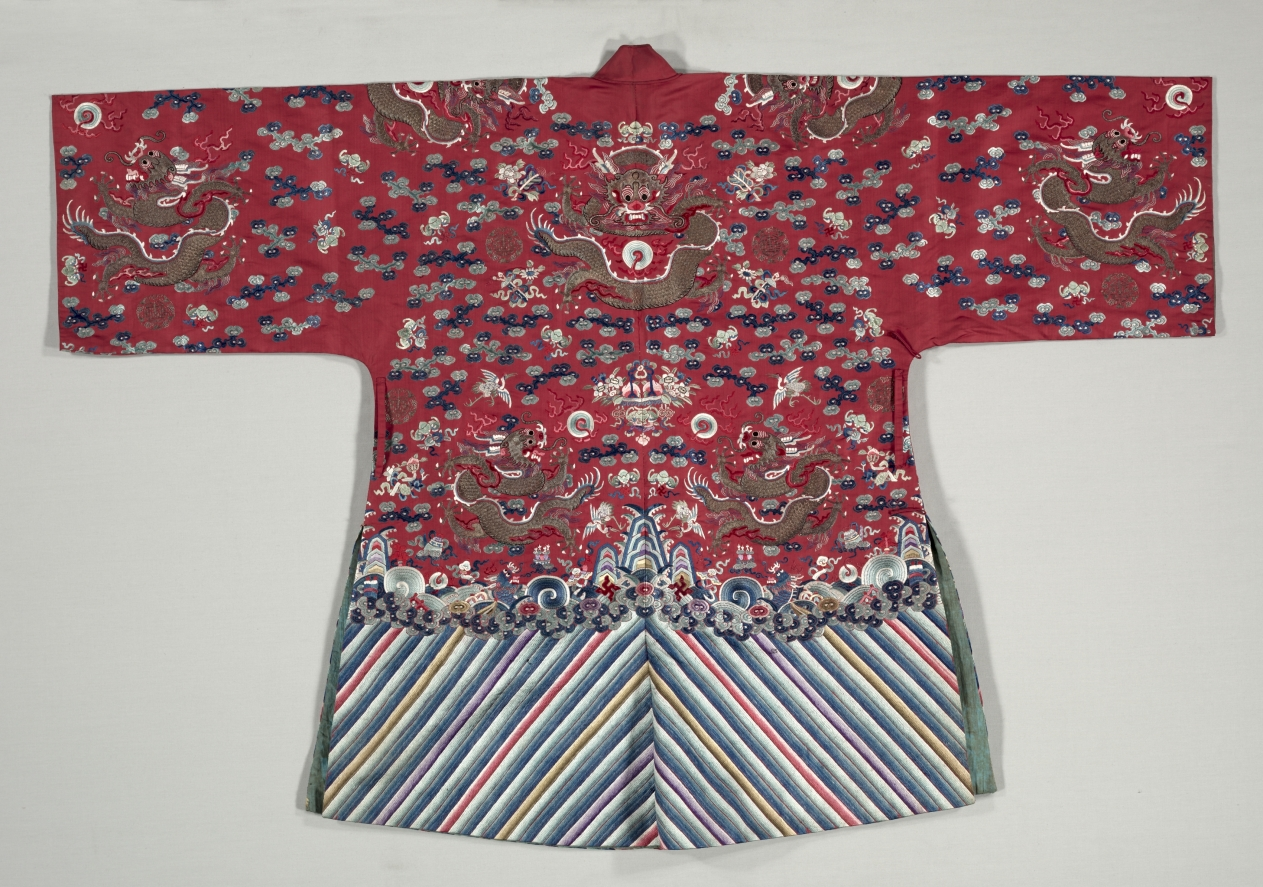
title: Woman's Bridal Dress, Dragon Jacket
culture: China, Qing dynasty (1644-1911)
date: 1800s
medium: Silk, gilt-metal thread; embroidery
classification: Garment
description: This three-piece bridal dress includes a dragon jacket, a pleated skirt, and a tabard, a short loose-fitting sleeveless vest. The ensemble reveals the high rank of her husband; it did not fall under the scope of the Qing dynasty sumptuary laws. The woman's bridal trousseau contains a short red coat fastened on the side and wide sleeves. It is decorated with ten dragons and other cosmological motifs commonly found on court dress. The presence of ten dragons indicates that the wife's husband was a high-ranking official.